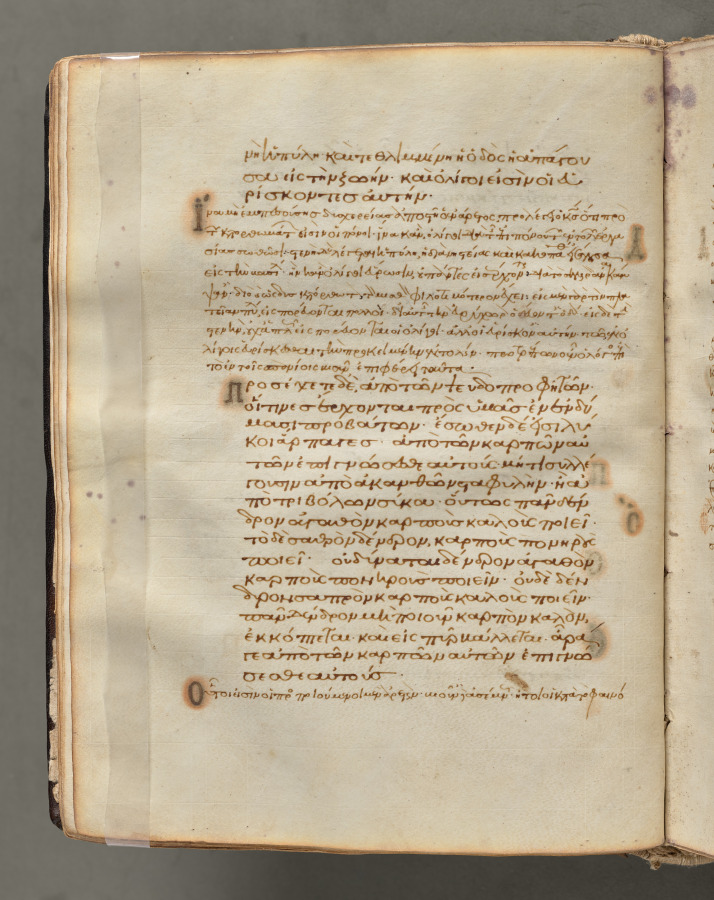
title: Text, folio 30 (verso), from a Gospel Book with Commentaries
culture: Byzantium, Constantinople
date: c. 1000–1100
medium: ink, tempera, and gold on vellum; leather binding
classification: Bound Volume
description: Each of the four gospels in this book opens on a page with brilliantly illuminated borders depicting the author of the text as well as birds—principally peacocks, symbols of the immortality of the soul—and fountains, representing the fountain of life and the salvation of the soul. This volume consists of 428 leaves with texts in Greek. Its level of sophistication suggests that it was probably written and decorated in a monastery in Constantinople.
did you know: Gospel books were carried in procession through Byzantine churches.